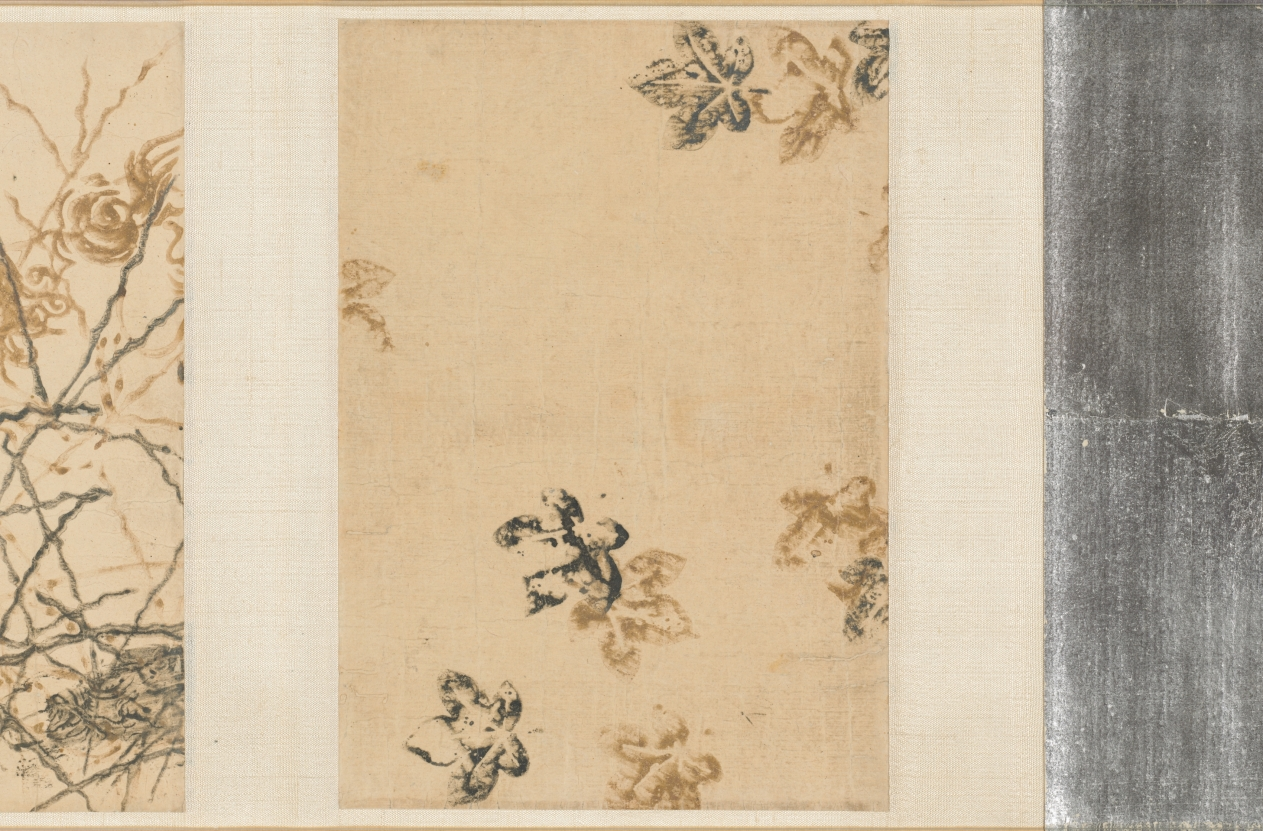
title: Selections from the New Collection of Japanese Poems from Ancient and Modern Times (Shinkokin wakashū) with Printed Designs of Chinese Lions and Crab Finger Grass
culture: Japan, Edo period (1615–1868)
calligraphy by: Hon'ami Kōetsu (Japanese, 1558–1637)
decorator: Tawaraya Sōtatsu (Japanese, c. 1570–c. 1640)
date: early 1600s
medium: handscroll; ink, gold, and silver on paper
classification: Calligraphy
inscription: Seal: 光悦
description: Hon’ami Kōetsu was a calligrapher and craftsman who frequently collaborated with the painter Tawaraya Sōtatsu, considered the first master of the Rinpa school. Kōetsu brushed seven poems from the autumn section of a poetry anthology onto dyed paper with motifs designed and printed in gold and silver by Sōtatsu.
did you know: Before becoming a master painter of screens, Tawaraya Sōtatsu painted fans.